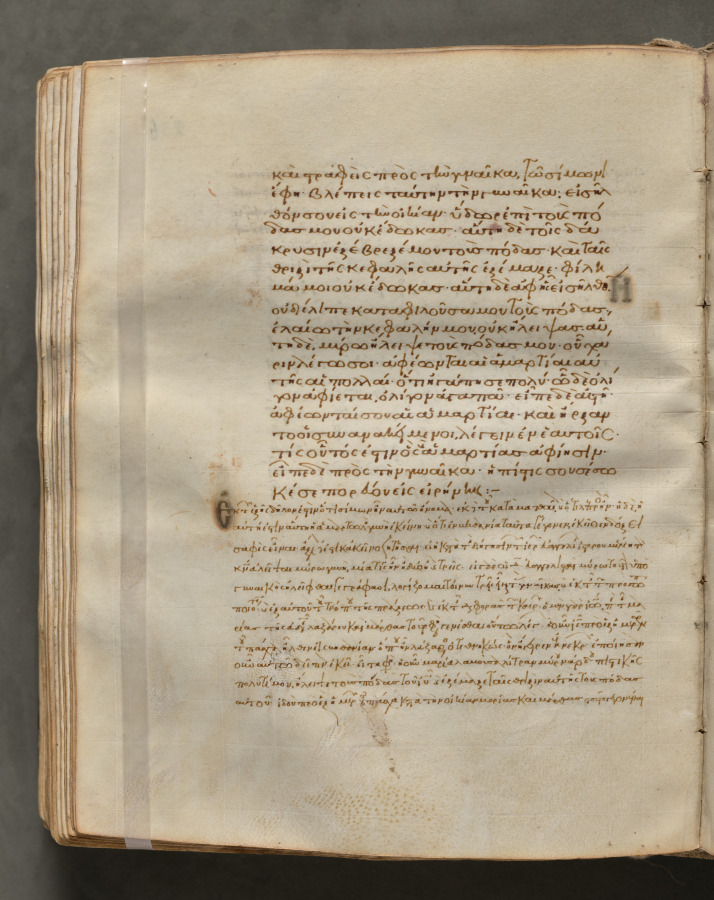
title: Text, folio 236 (verso), from a Gospel Book with Commentaries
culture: Byzantium, Constantinople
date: c. 1000–1100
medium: ink, tempera, and gold on vellum; leather binding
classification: Bound Volume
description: Each of the four gospels in this book opens on a page with brilliantly illuminated borders depicting the author of the text as well as birds—principally peacocks, symbols of the immortality of the soul—and fountains, representing the fountain of life and the salvation of the soul. This volume consists of 428 leaves with texts in Greek. Its level of sophistication suggests that it was probably written and decorated in a monastery in Constantinople.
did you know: Gospel books were carried in procession through Byzantine churches.